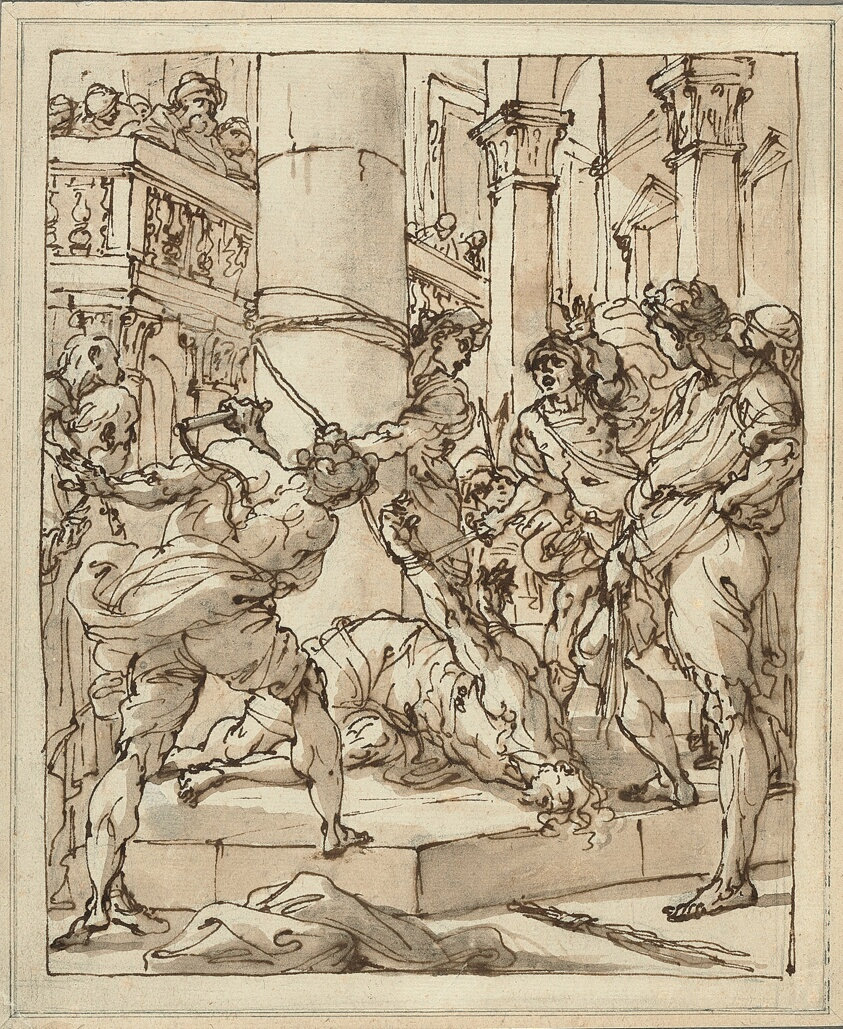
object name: Drawing and Watercolor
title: The Flagellation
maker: Ubaldo Gandolfi (Italian, 1728–1781)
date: early 1770s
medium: Pen and brown ink, with brush and brown wash, over black chalk, on cream laid paper, laid down on cream wove paper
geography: Italy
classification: pen and ink drawings; drawings (visual works); paper; prints and drawing